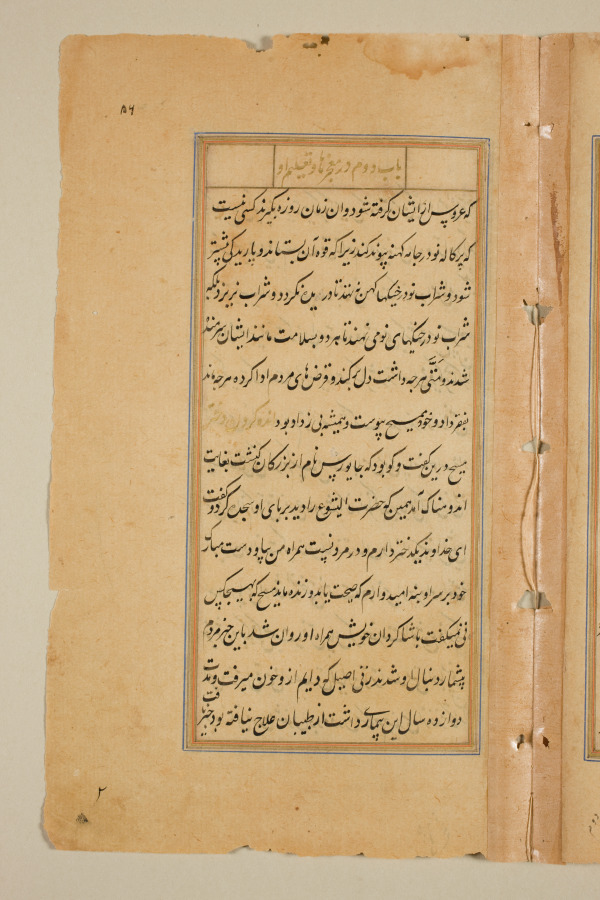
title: Text page from a Mirror of Holiness (Mir’at al-quds) of Father Jerome Xavier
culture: Mughal India, Allahabad, made for Prince Salim (1569–1627)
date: 1602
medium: Ink and gold on paper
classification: Manuscript